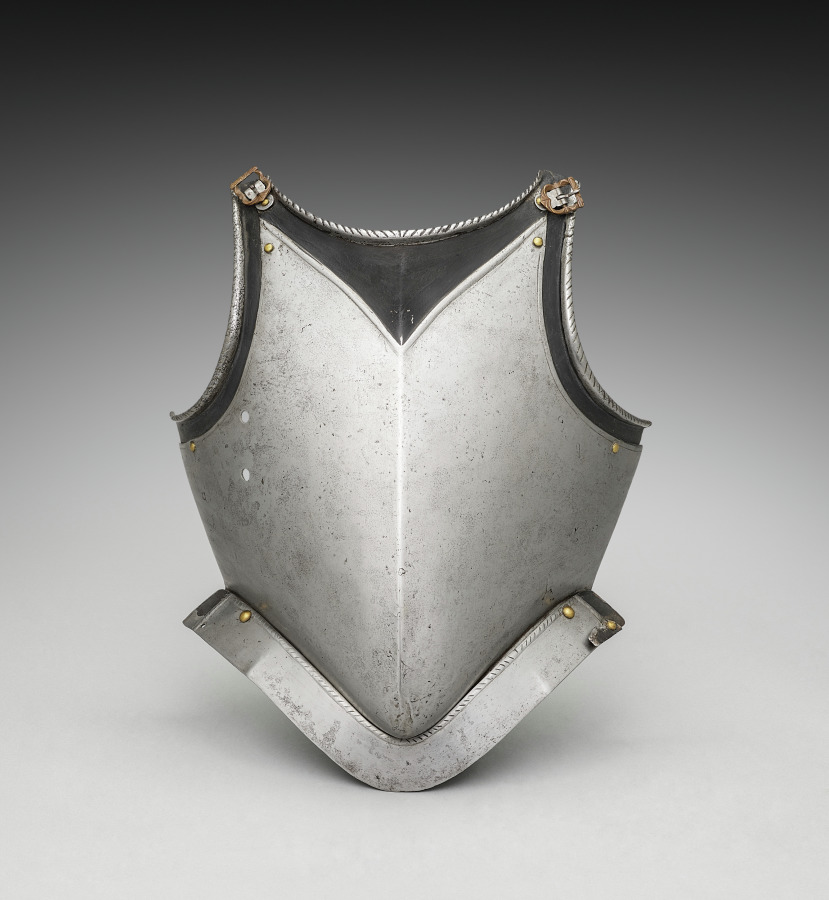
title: Breastplate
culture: Germany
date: c.1550–1570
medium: iron, steel, leather and brass rivets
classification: Arms and Armor